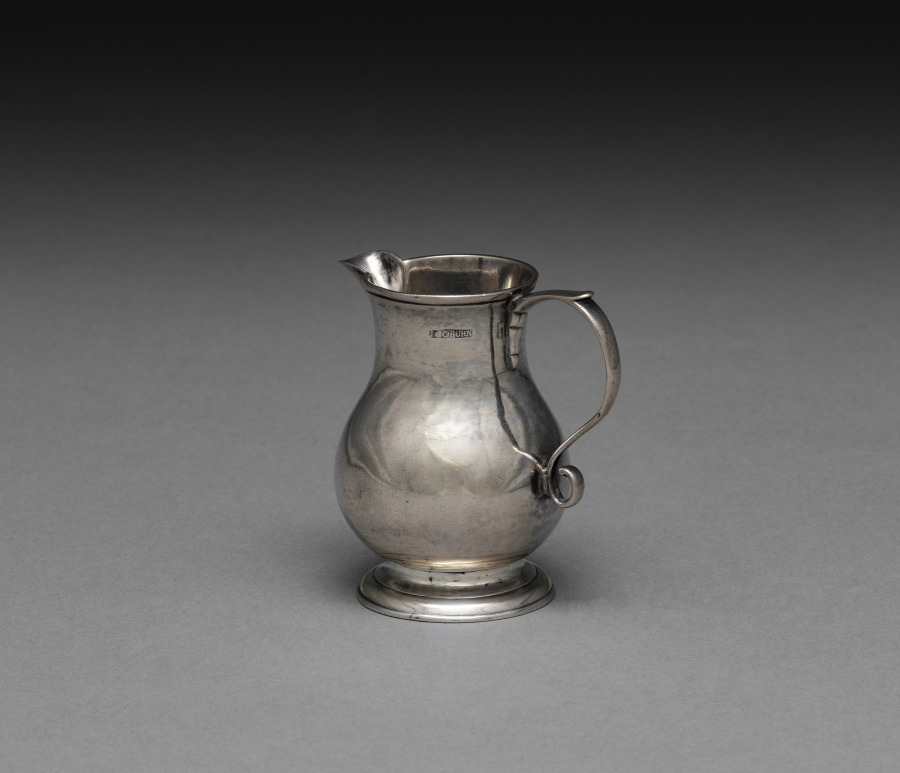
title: Cream Jug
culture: America, Massachusetts, Boston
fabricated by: John Coburn (American, 1725–1803)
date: c. 1745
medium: silver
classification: Silver